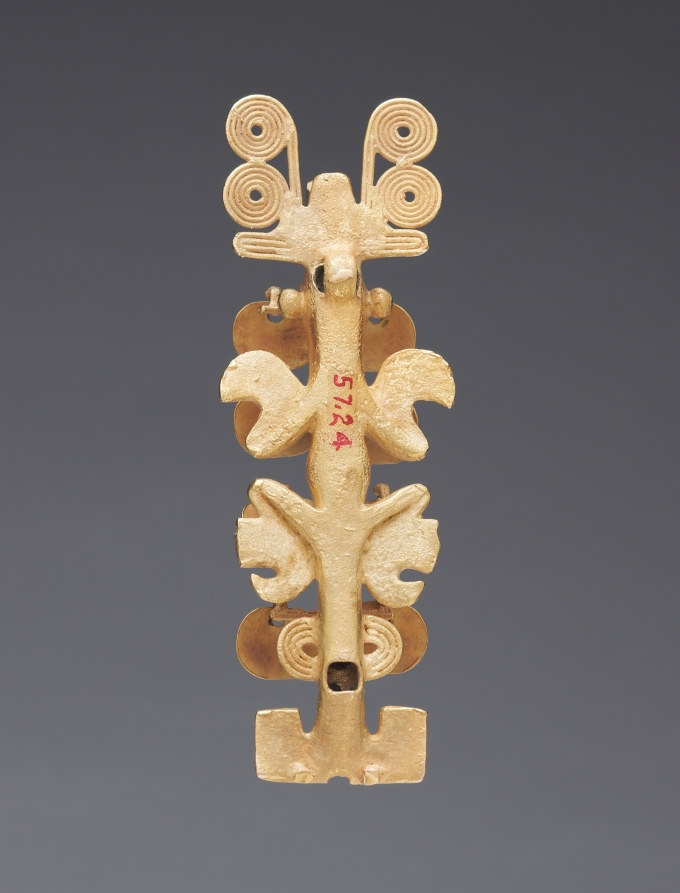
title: Pendant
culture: Panama, International Style, 5th-7th century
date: 400–700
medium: cast gold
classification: Metalwork